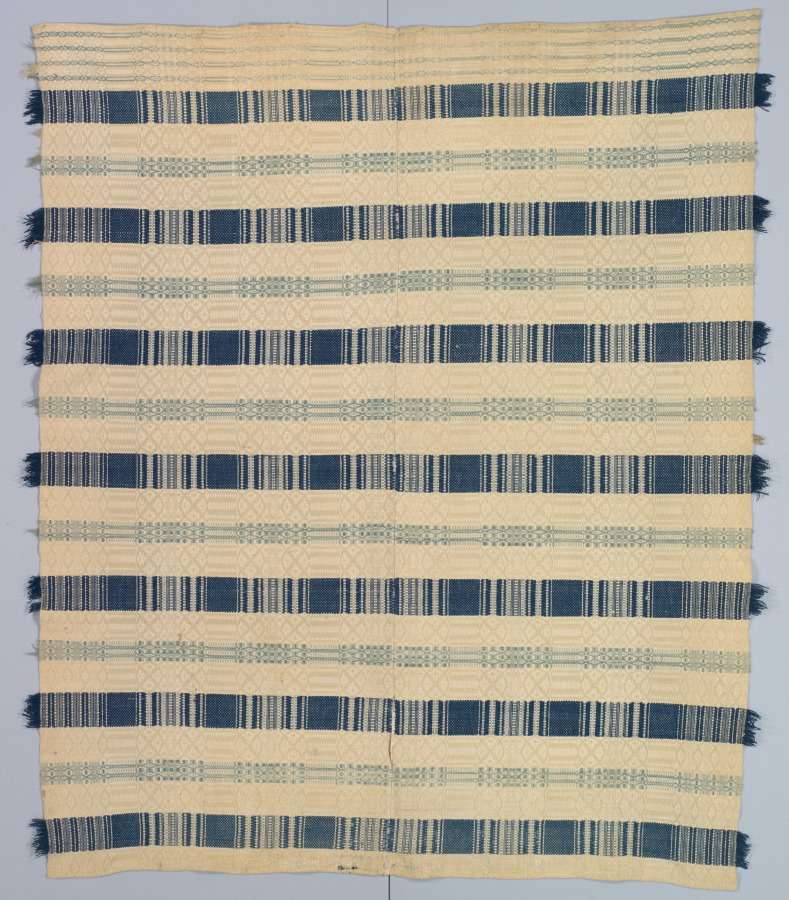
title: Woven Coverlet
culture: America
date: c. 1867–1868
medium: wool and cotton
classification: Textile